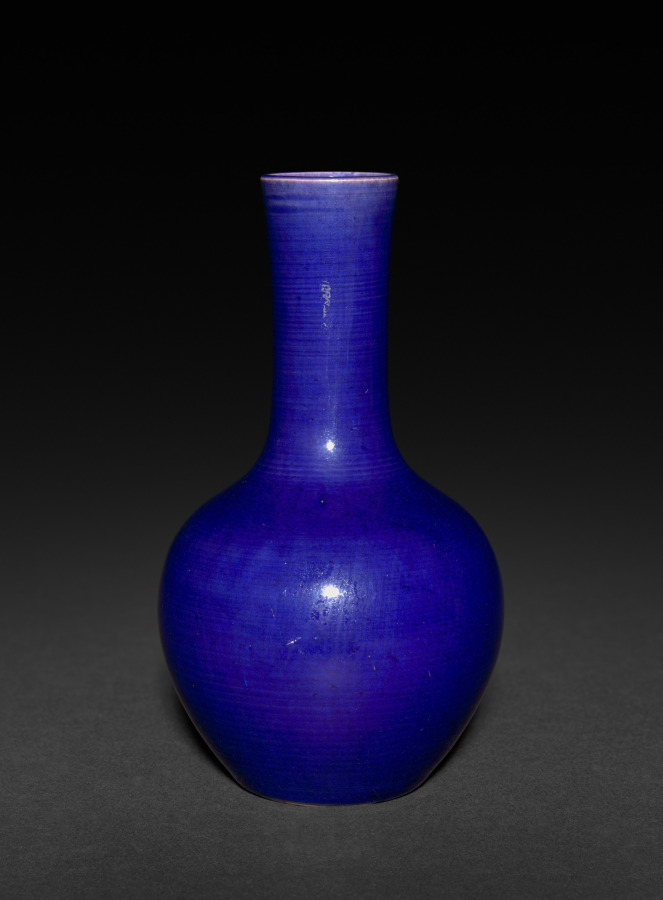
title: Bottle-Shaped Vase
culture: China, Qing dynasty (1644–1911), Qianlong reign (1736–95)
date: 1736–95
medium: porcelain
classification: Ceramic